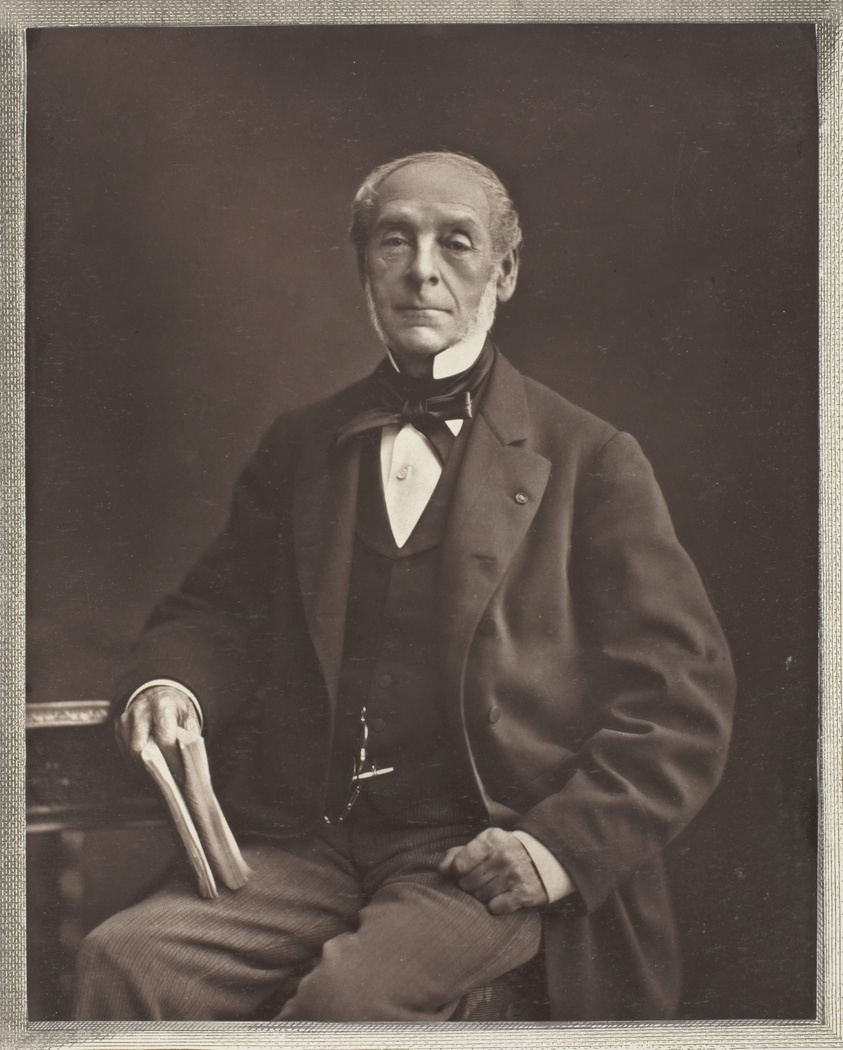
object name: Photograph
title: Ernest Legouvé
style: 19th century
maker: Nadar (Gaspard Félix Tournachon) (French, 1820–1910)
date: 1853/76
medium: Woodburytype, from the periodical “Galerie Contemporaine Littéraire, Artistique” (1876), volume 3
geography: France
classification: woodburytype; photomechanical process; photography; photograph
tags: Collected by Hugh Edwards, Contemporaine Littéraire